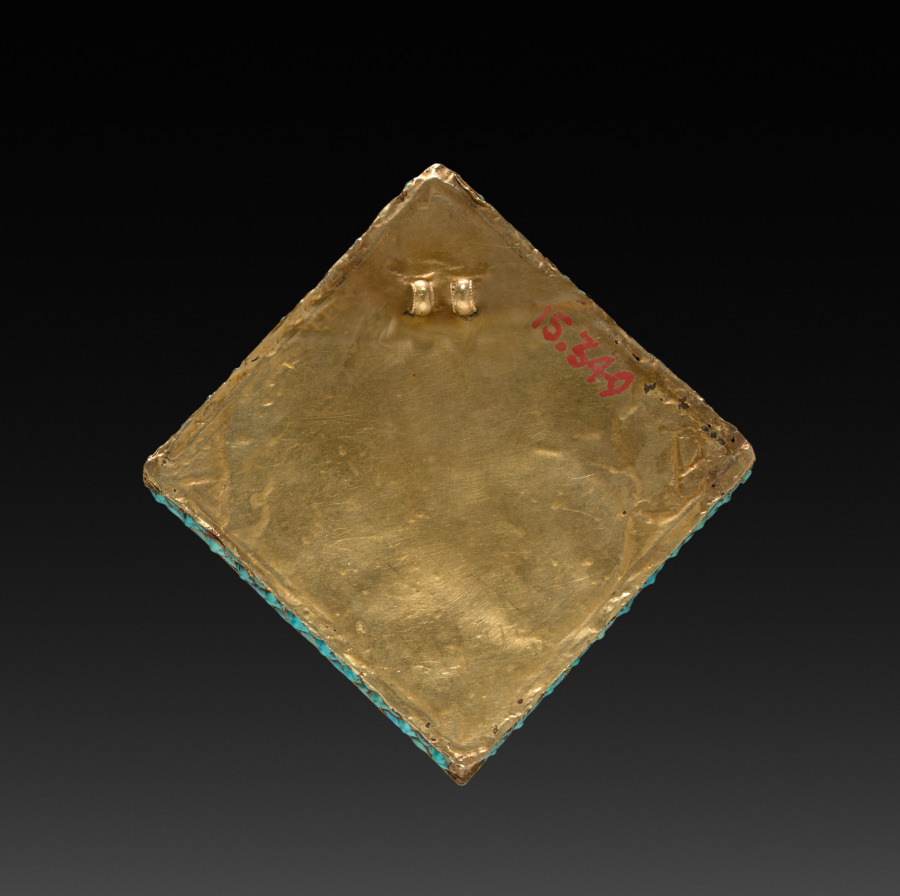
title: Charm Case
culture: Tibet, 19th century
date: 1800s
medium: gold with jewels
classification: Jewelry